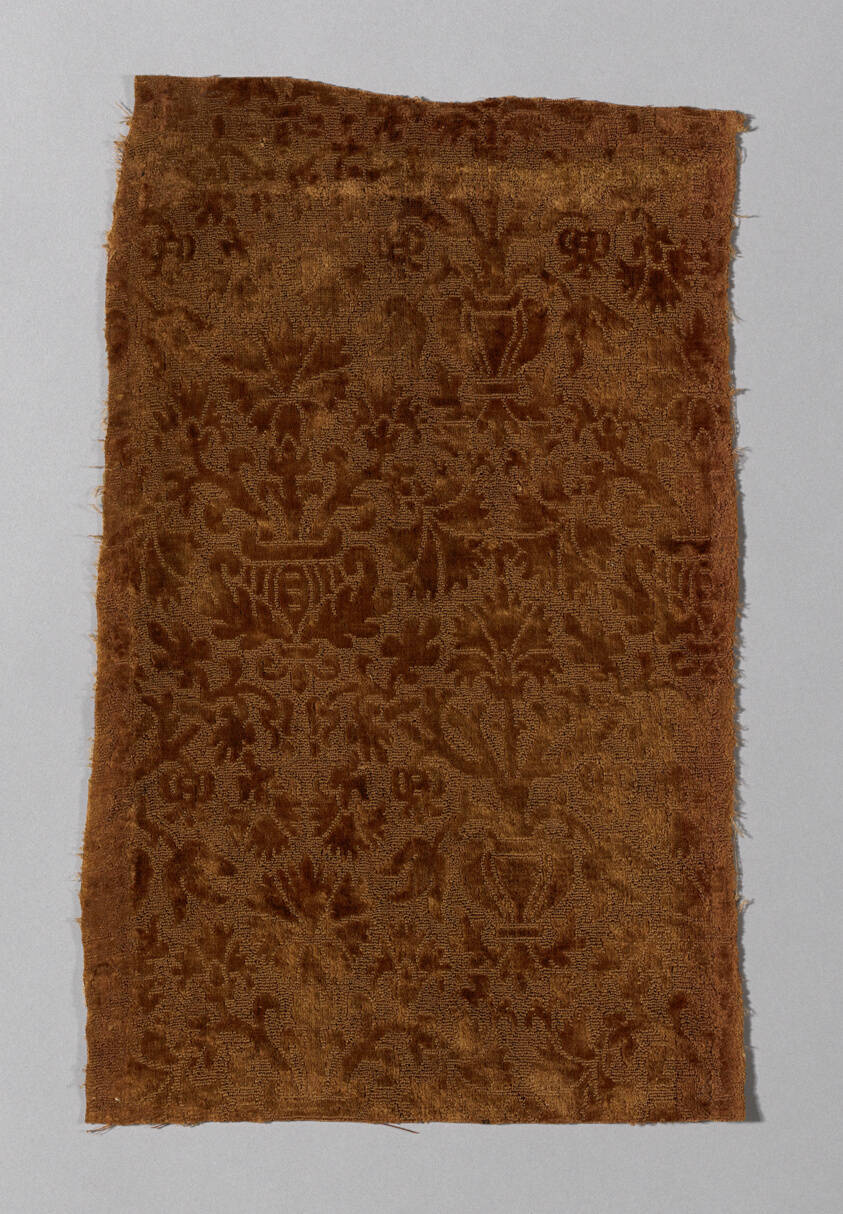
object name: Textile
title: Fragment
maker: Italy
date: 1575/1600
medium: cisele solid twill velvet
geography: Italy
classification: textile; weaving - velvet; weaving